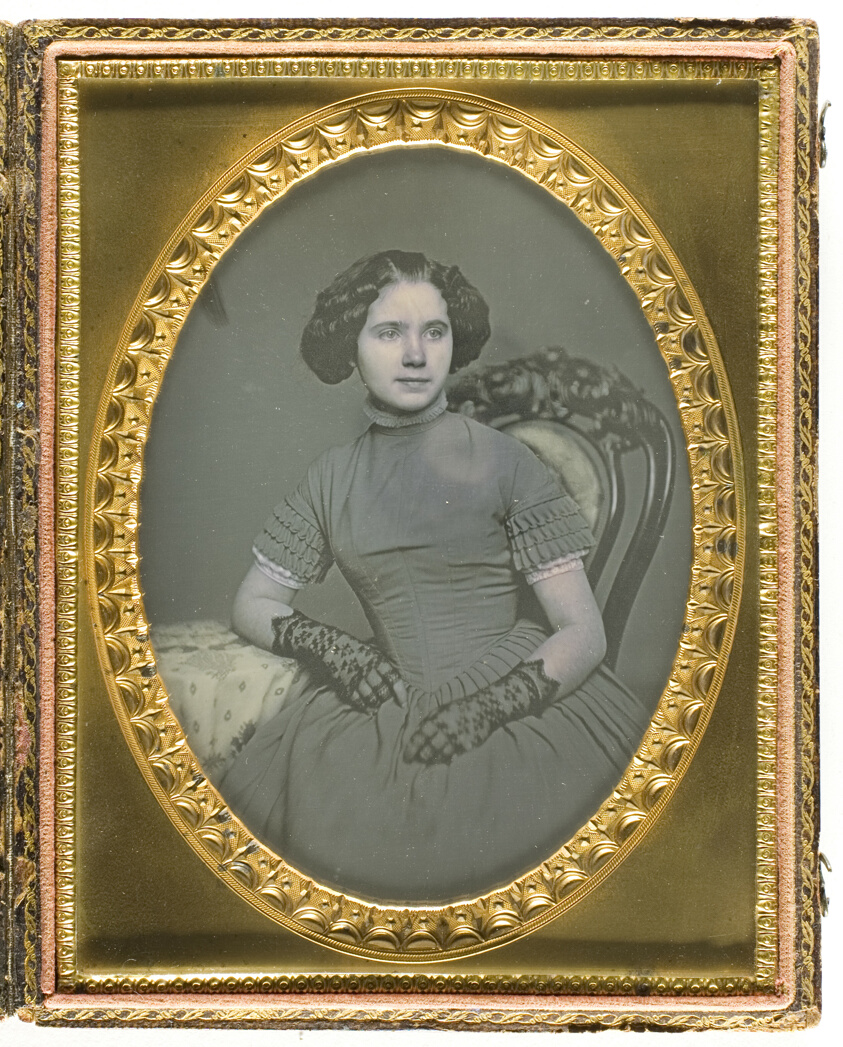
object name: Photograph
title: Untitled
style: 19th century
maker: Artist unknown; 19th century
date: 1839/60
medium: Daguerreotype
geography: Unknown Place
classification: daguerreotype; photographic process; photography; photograph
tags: portraits, portraits: female subject, photography, formal portraits